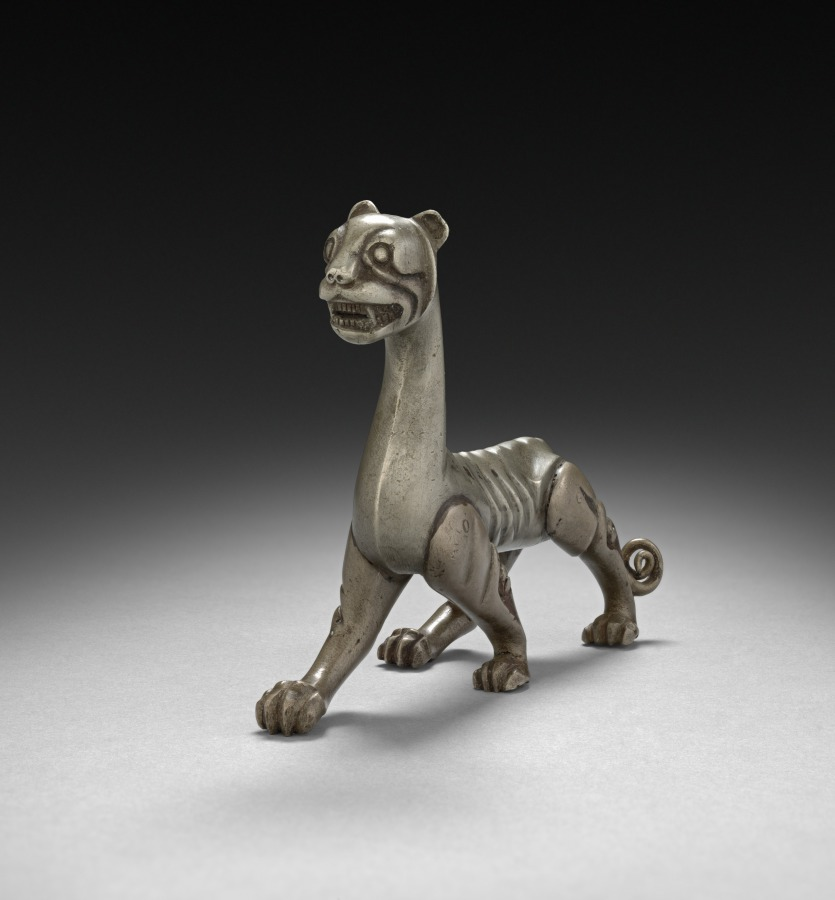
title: Walking Tiger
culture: China, Han dynasty (202 BCE–220 CE) to Six Dynasties (265–587 CE)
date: 206 BCE–220 CE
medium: silver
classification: Sculpture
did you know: The walking tiger was cast in six sections—the head and torso, the four legs, and the tail—and then were soldered together.